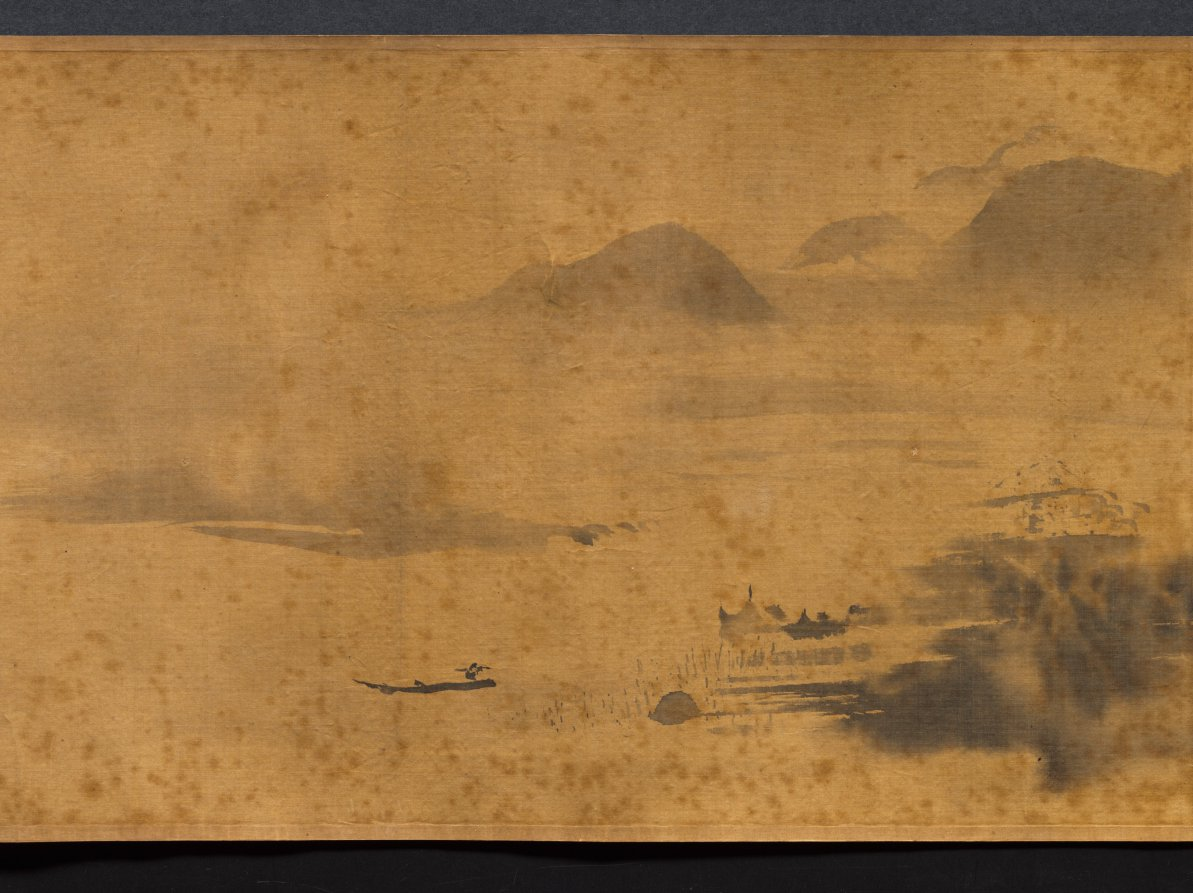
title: Eight Views of Xiao-Xiang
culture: Japan, Edo period (1615–1868)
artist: Kano Tan’yū (Japanese, 1602–1674)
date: 1615–1868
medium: handscroll; ink on silk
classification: Painting